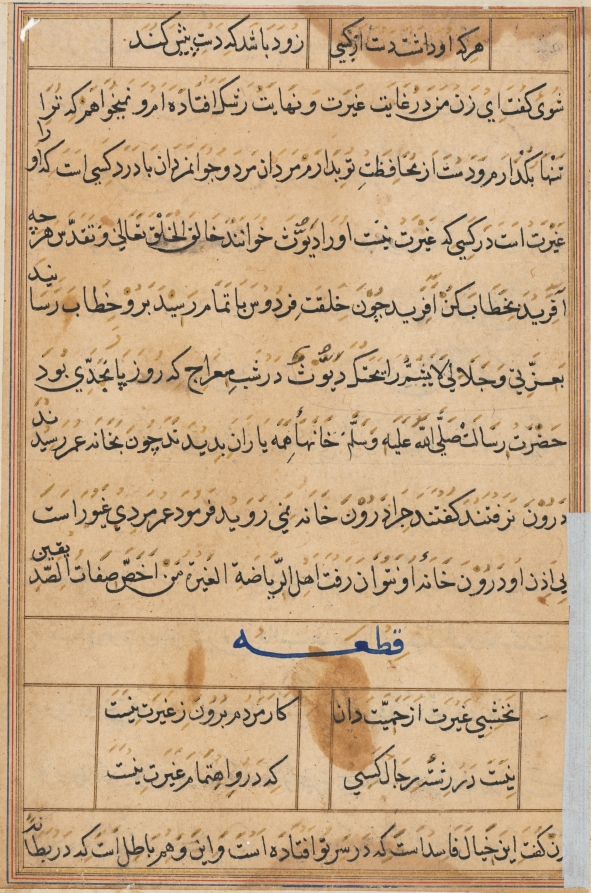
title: Page from Tales of a Parrot (Tuti-nama): text page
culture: Mughal India, court of Akbar (reigned 1556–1605)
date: c. 1560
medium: gum tempera, ink, and gold on paper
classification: Painting